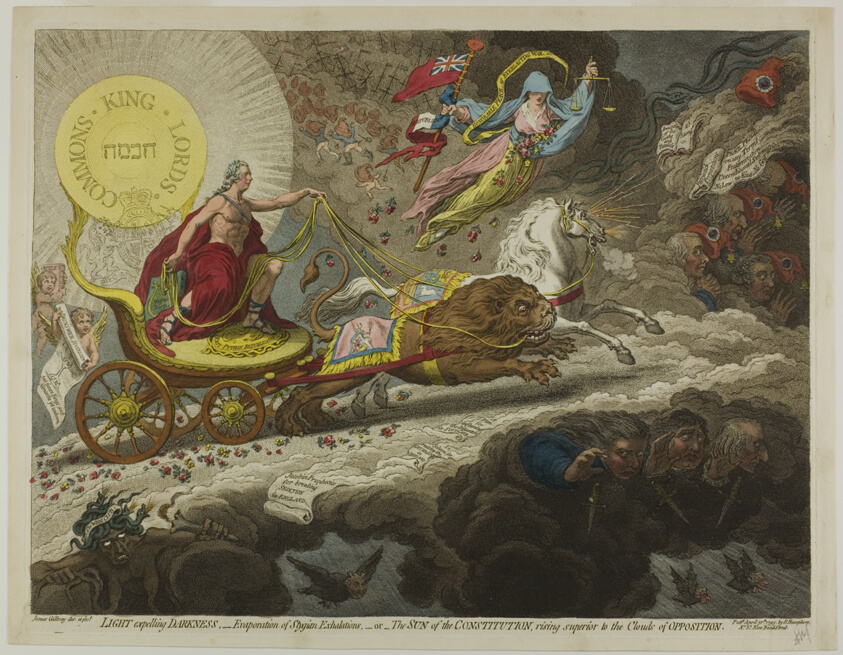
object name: Print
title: Light Expelling Darkness,-Evaporation of Stygian Exhalations,-or-The Sun of the Constitution, Rising Superior to the Clouds of Opposition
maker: James Gillray (English, 1756-1815); published by Hannah Humphrey (English, c. 1745-1818)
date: published April 30, 1795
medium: Etching in dark brown, with handcoloring, on cream wove paper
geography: England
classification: etching; print; prints and drawing